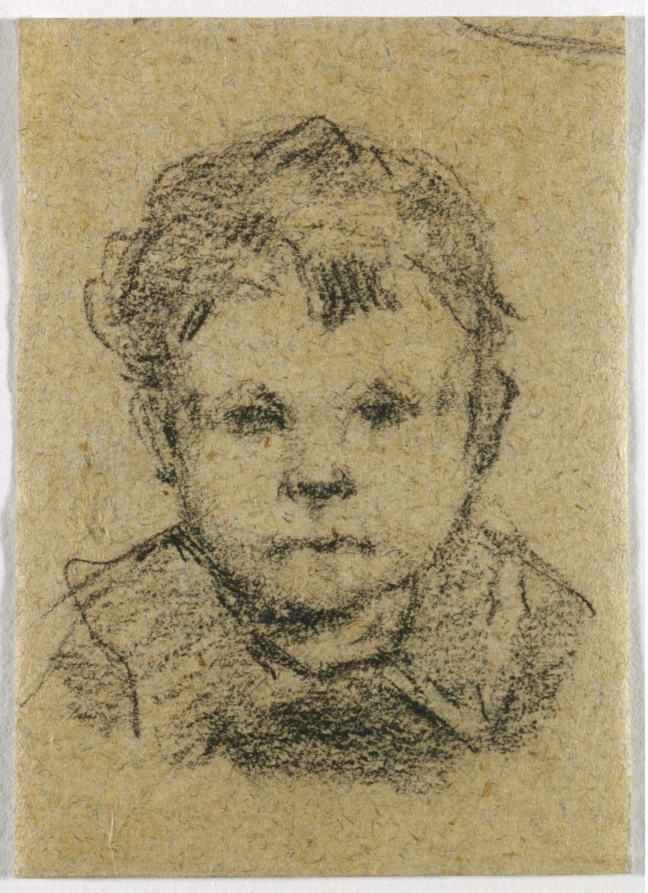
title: Emil Gauguin as a Child, Wearing a Collared Shirt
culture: France, 19th century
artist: Paul Gauguin (French, 1848–1903)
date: c. 1875–1876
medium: black crayon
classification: Drawing